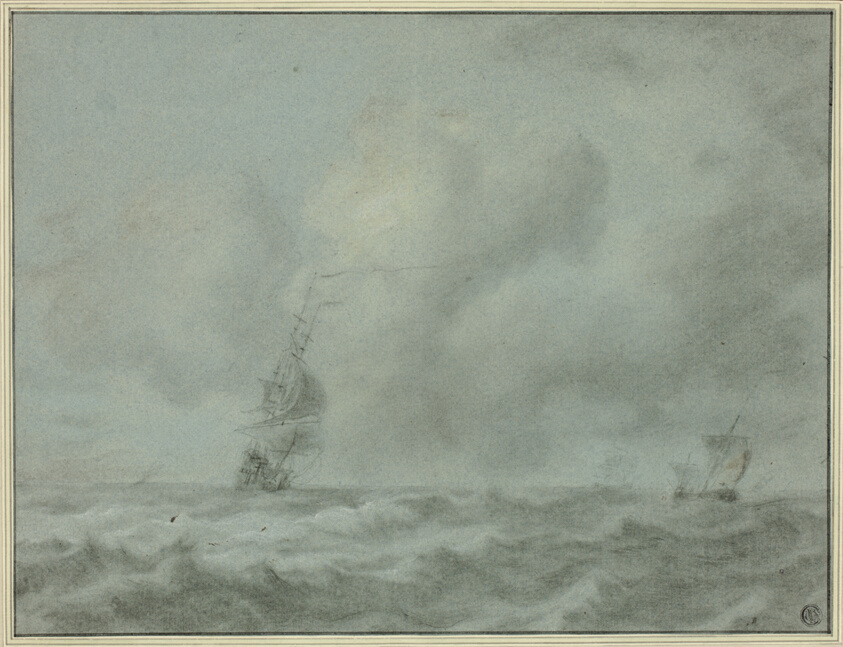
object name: Drawing and Watercolor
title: Boats on Ocean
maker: Attributed to Jan van Goyen; Dutch, 1596-1656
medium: Charcoal with stumping, heightened with lead white and brush and lead white (discolored) wash, on blue laid paper, laid down on cream laid paper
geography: Netherlands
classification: charcoal; paper; drawings (visual works); prints and drawing